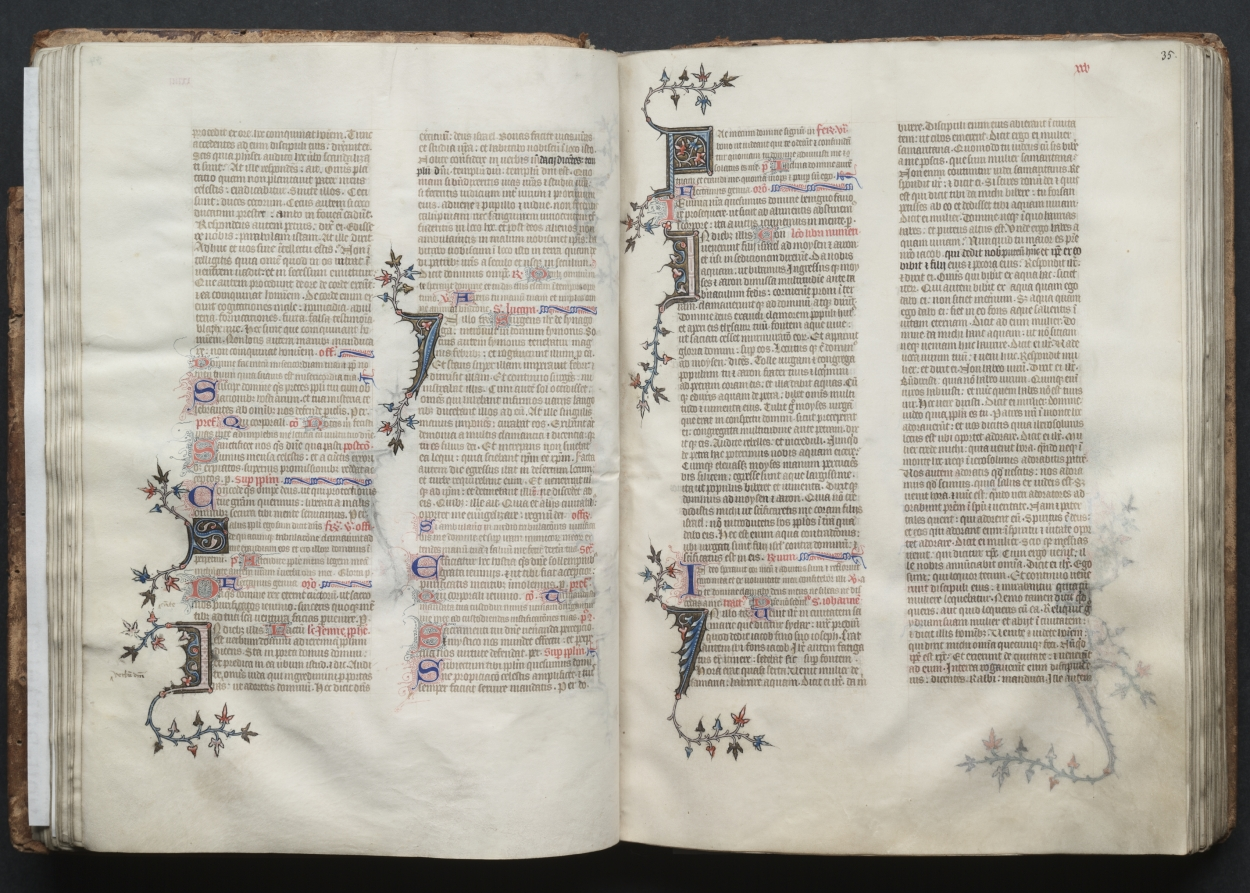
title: The Gotha Missal: Fol. 34v, Text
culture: France, Paris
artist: Master of the Boqueteaux (French)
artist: and Workshop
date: c. 1375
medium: ink, tempera, and gold on vellum; blind-tooled leather binding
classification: Bound Volume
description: The style and quality of this manuscript's decoration is typical of deluxe Parisian books made for aristocratic or royal patrons. Most of the book's decoration appears to be the work of the Master of the Boqueteaux, an artist active at the court of King Charles V (died 1380). His style was apparently shared by a number of book illuminators working in and around Paris. It is very possible that the Gotha Missal belonged to Charles V, but is not provable because the manuscript has no royal portraits and lacks a colophon. Given the book's magnificent decoration, however, it would seem that it was produced for a Valois prince, if not for the king himself. The manuscript receives its name from the German dukes of Gotha, its later owners.